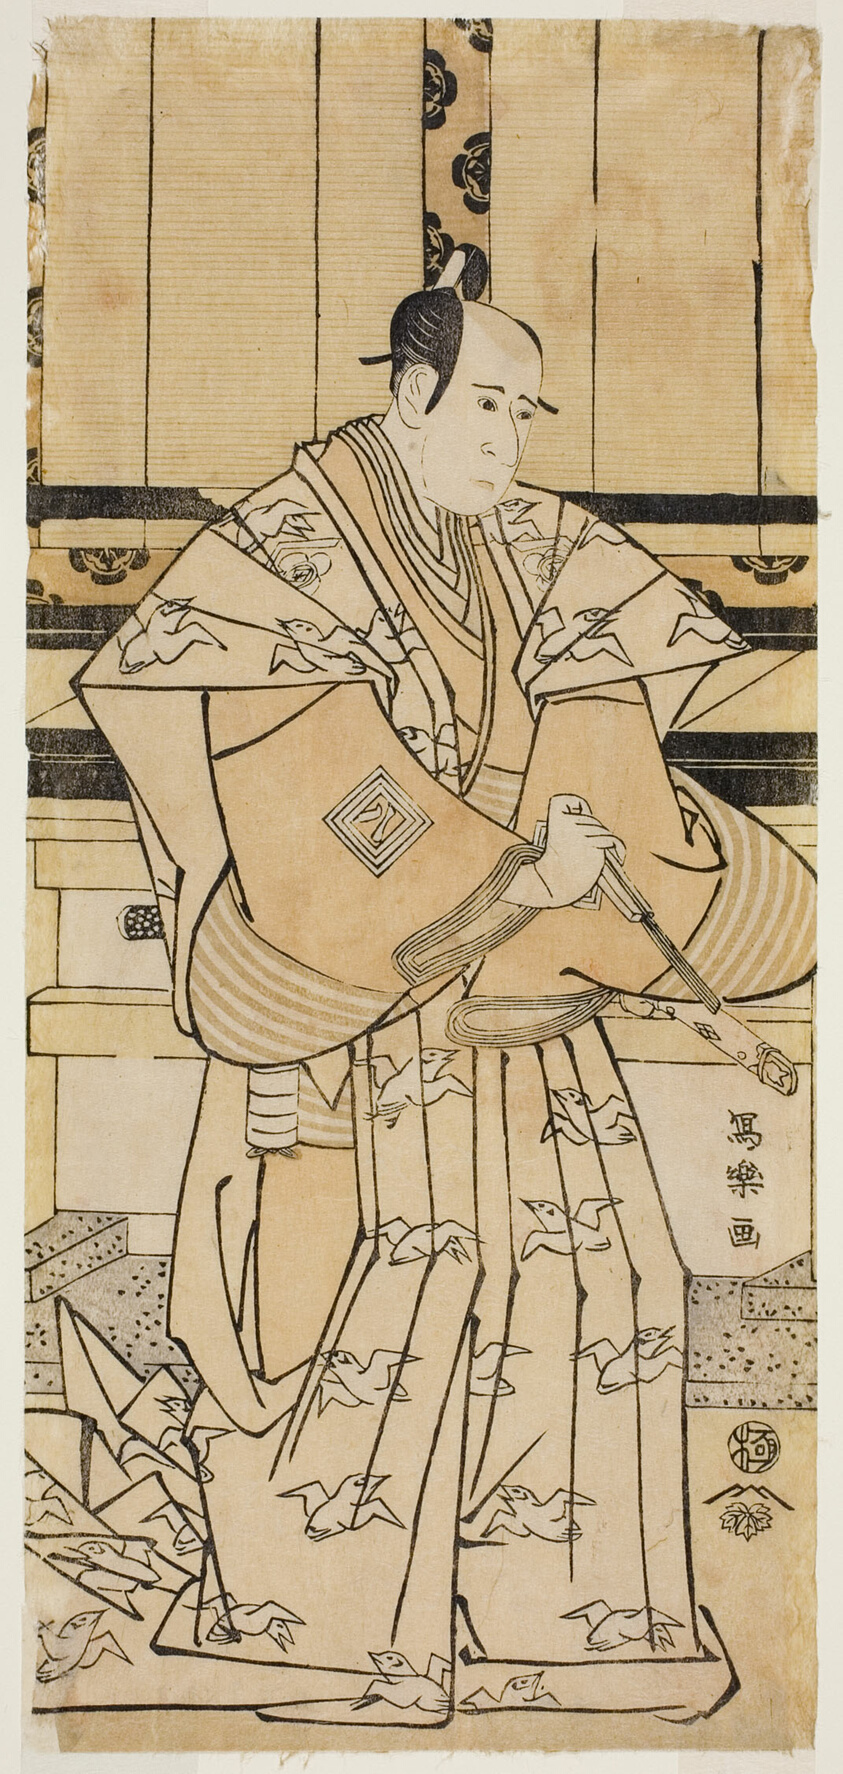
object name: Print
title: The Actor Ichikawa Yaozo lll as Soga no Juro Sukenari (Sandai-me Ichikawa Yaozo no Soga no Juro Sukenari)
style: Japanese (culture or style)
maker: Toshusai Sharaku 東洲斎 写楽; Japanese, active 1794-95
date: 1795 (Kansei 7)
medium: Color woodblock print; hosoban, nishiki-e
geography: Japan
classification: woodblock print; print; asian art